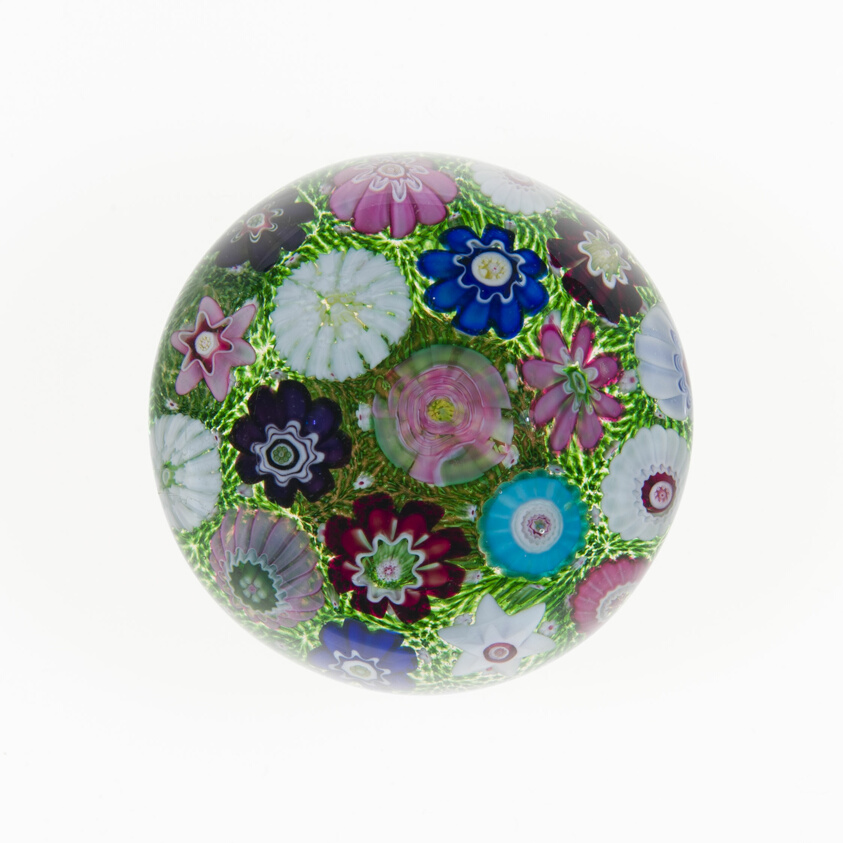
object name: Glass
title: Paperweight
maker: Clichy Glassworks (Cristalleries de Clichy); Clichy, France, 1837-1885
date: c. 1845/60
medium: Glass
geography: France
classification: paperweight; glass